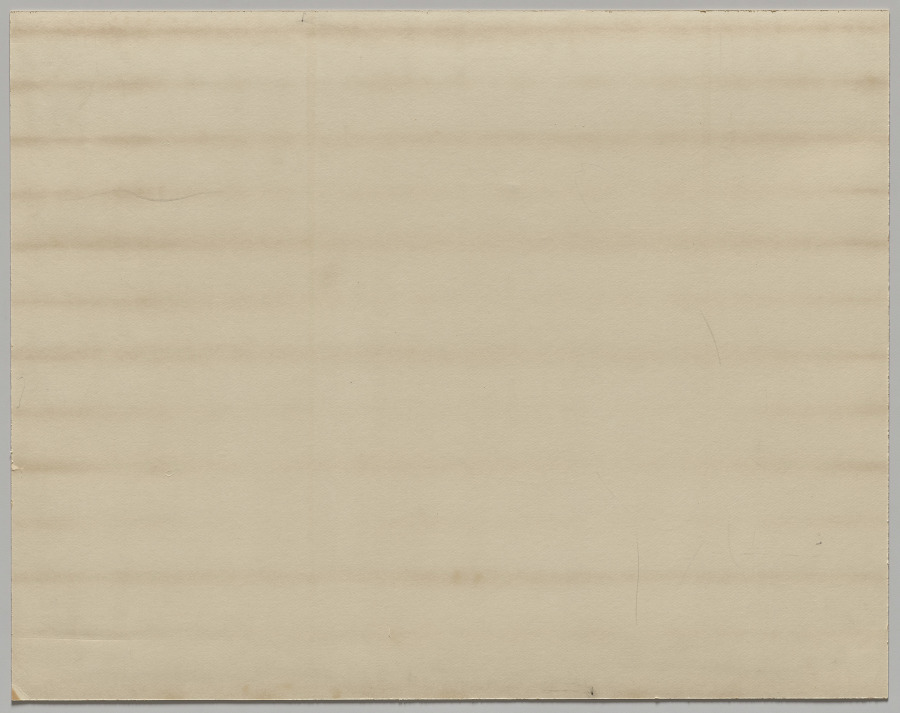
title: Château de Chillon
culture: France, 19th century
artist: Adolphe Braun (French, 1812–1877)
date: c. 1870, printed c. 1900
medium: carbon print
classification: Photograph